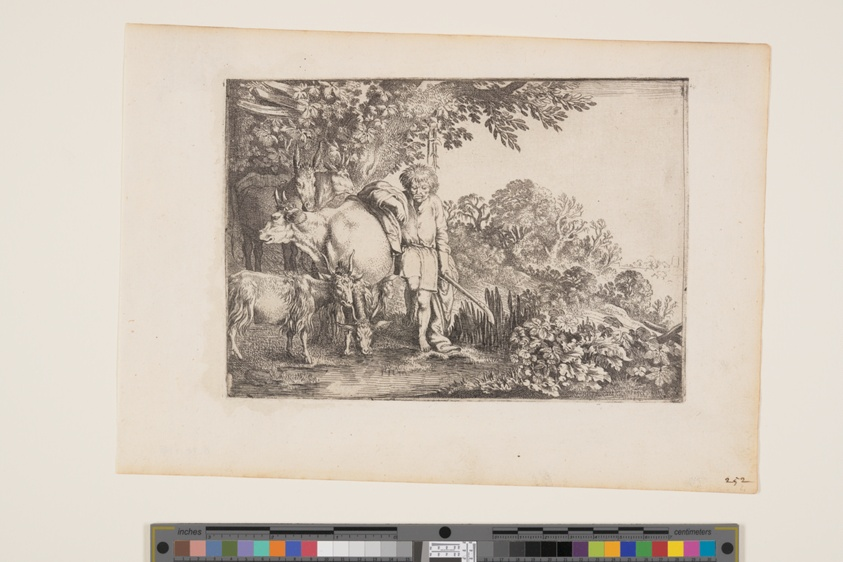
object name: Print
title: Argus Attending his Herd, plate 2 from The Story of Mercury and Argus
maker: Moses van Uyttenbroeck (Dutch, c. 1595–before 1647)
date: c. 1620-26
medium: Etching on ivory laid paper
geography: Netherlands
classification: etching; paper; print; prints and drawing